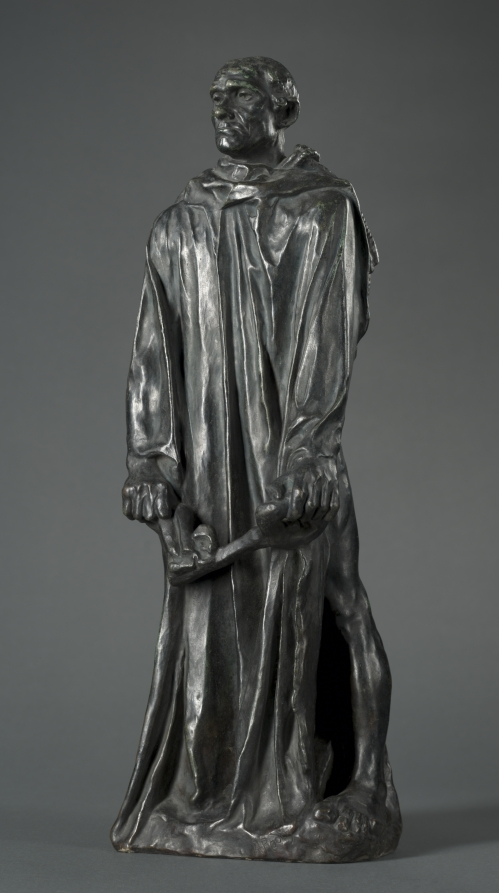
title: Jean d'Aire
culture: France, 19th century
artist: Auguste Rodin (French, 1840–1917)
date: 1884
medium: bronze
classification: Sculpture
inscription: signed front of base: "A. Rodin." Inscribed back of base: "Alexis Rudier/Fondeur, Paris."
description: In 1884 Rodin received a commission to create a large public monument honoring six French men who volunteered to be taken prisoner by an English army in exchange for the English releasing the town of Calais from a brutal 11-month siege. This reduced cast depicts one of the volunteers from the monument. Rather than idealized heroes, Rodin portrays the prominent citizens known as burghers as ordinary men experiencing personal confrontations with death. Jean d’Aire faces his fate with stoic resolve. The thick folds of his tunic weigh heavily on his body, as if symbolic of an internal struggle between his willingness to sacrifice his life and a desire to live. His intense glare into space seems to betray the dread and anxiety raging within his mind. Immensely popular as an independent sculpture, Rodin made numerous versions in various sizes.